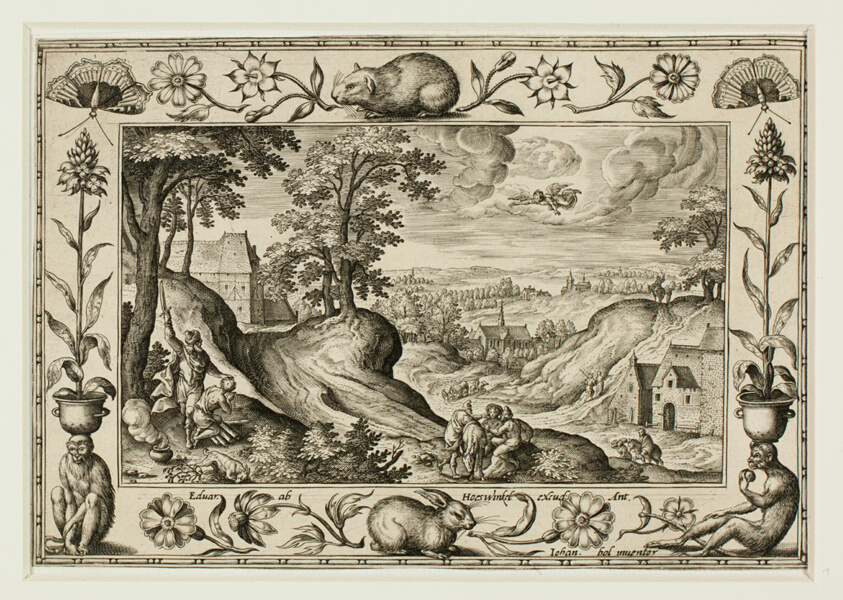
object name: Print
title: Abraham's Sacrifice of Isaac, from Landscapes with Old and New Testament Scenes and Hunting Scenes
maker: Adriaen Collaert (Flemish, c. 1560–1618); after Hans Bol (Flemish, 1534–1593); published by Anna van Hoeswinckel (Flemish)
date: 1584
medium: Engraving in black on cream laid paper, laid down on cream laid paper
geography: Flanders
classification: engraving; paper; print; prints and drawing